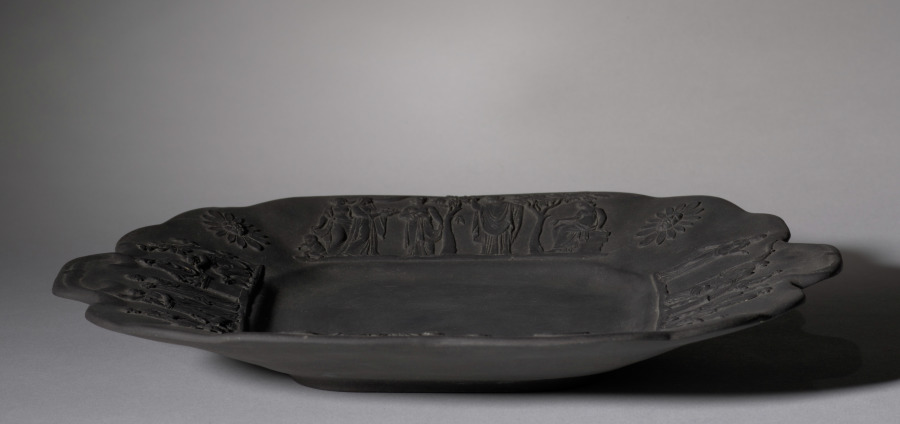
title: Plate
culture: England, Staffordshire, 19th century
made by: Wedgwood Factory (British)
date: 1800s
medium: black basalt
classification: Ceramic